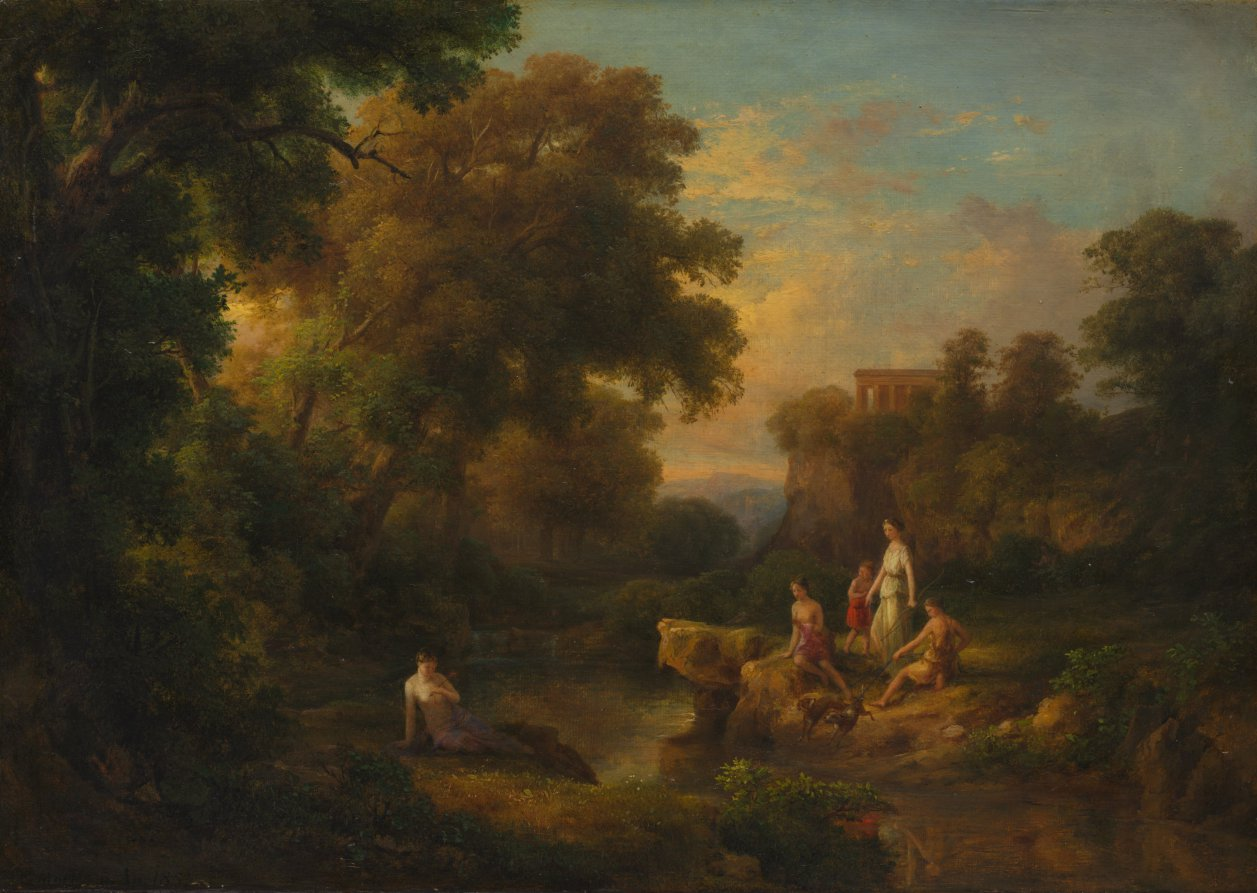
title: Diana and Her Nymphs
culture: Hungary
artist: Károly Markó (Hungarian, 1791–1860)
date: 1853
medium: oil on fabric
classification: Painting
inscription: Signed lower left: C. Markó p. Ap. 1853